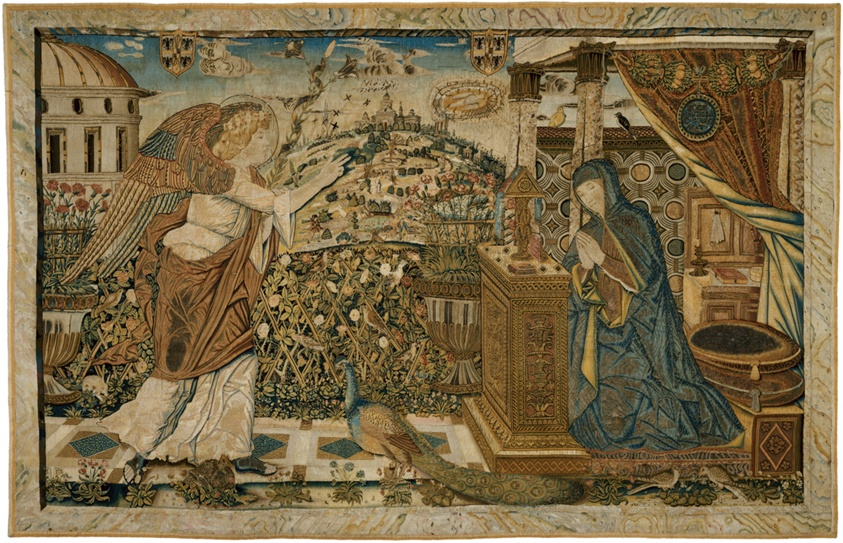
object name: Coverings and Hangings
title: The Annunciation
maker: After a design by an artist in the circle of Andrea Mantegna (Italian, 1431–1506)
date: 1484/1519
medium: Wool, silk, and gilt- and silvered-metal-strip-wrapped silk, slit, dovetailed and interlocking tapestry weave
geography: Mantua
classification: weaving - tapestry; tapestry; textile